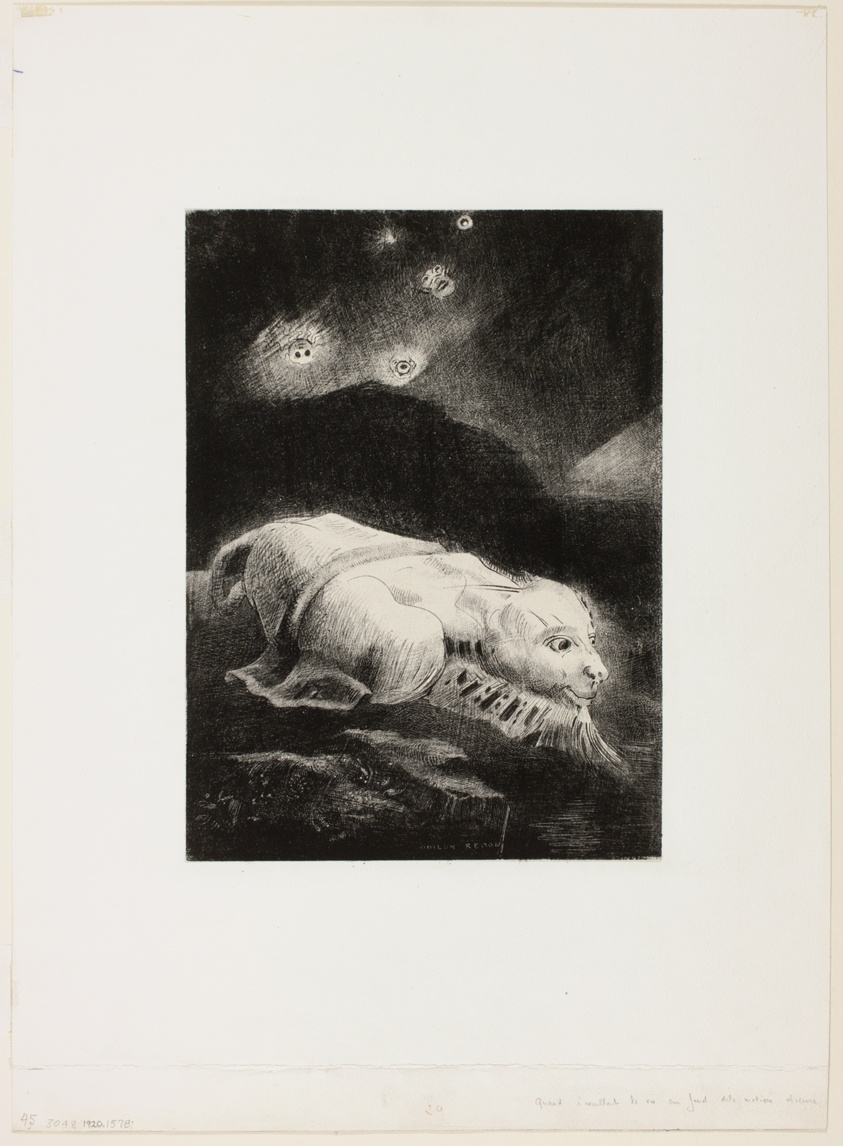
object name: Print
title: When Life Was Awakening in the Depths of Obscure Matter, plate 1 of 8 from "Les Origines"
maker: Odilon Redon (French, 1840-1916)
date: 1883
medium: Lithograph in black on ivory China paper, laid down on white wove paper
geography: France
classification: lithograph; print; prints and drawing; paper